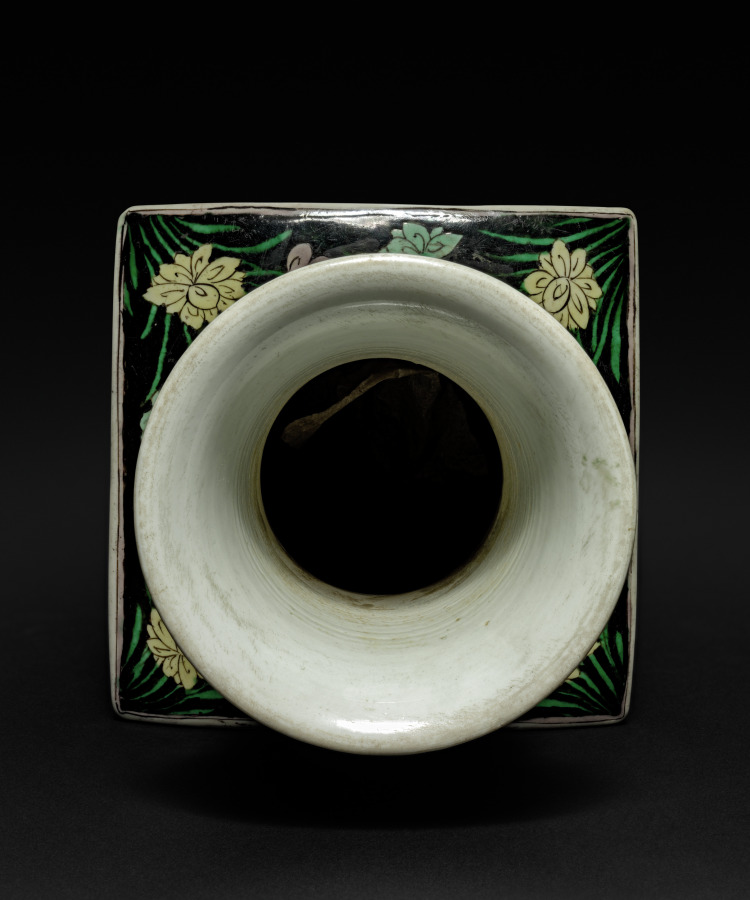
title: Club-shaped Vase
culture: China, Qing dynasty (1644-1911), Kangxi reign (1662-1722)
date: 1662–1722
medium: porcelain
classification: Ceramic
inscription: 碧玉堂製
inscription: [arrow] / Stand #115